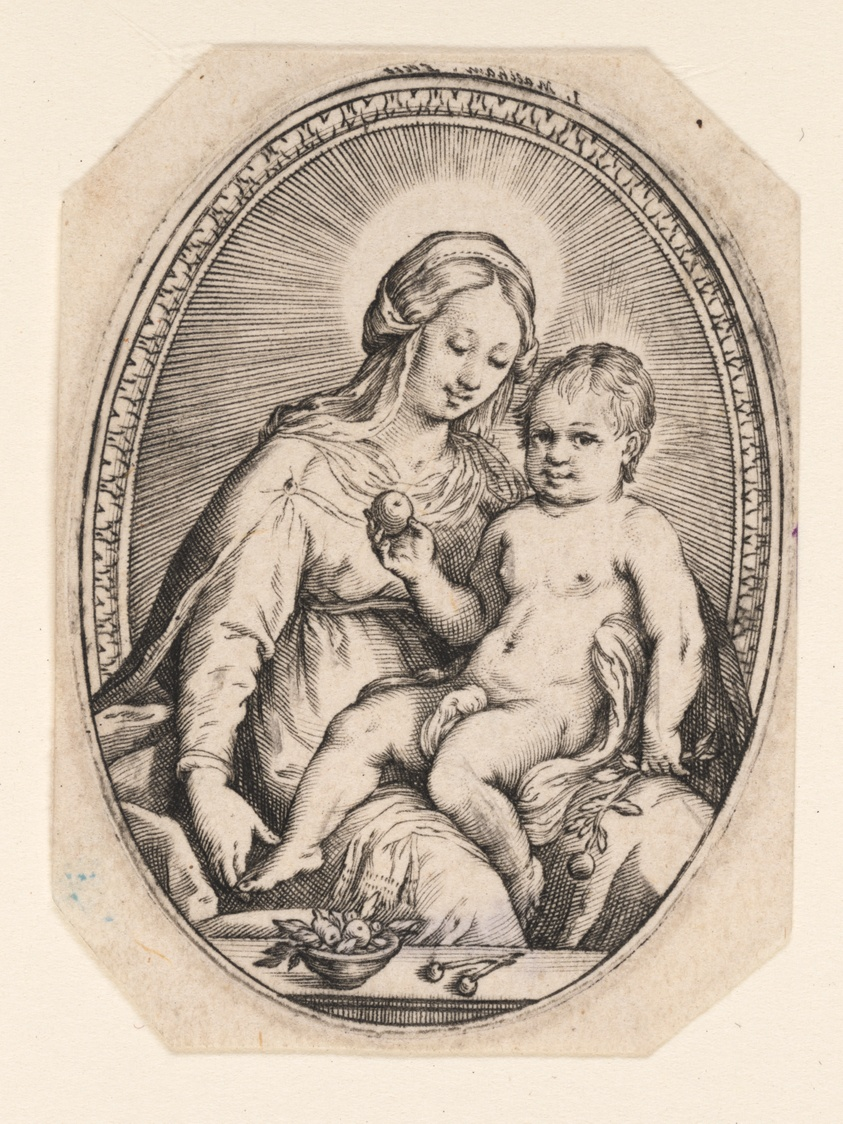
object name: Print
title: The Virgin and Child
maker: Jacob Matham (Dutch, 1571–1631); after Hendrick Goltzius (Dutch, 1558–1617)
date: c. 1600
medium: Engraving on paper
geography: Netherlands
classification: engraving; paper; print; prints and drawing